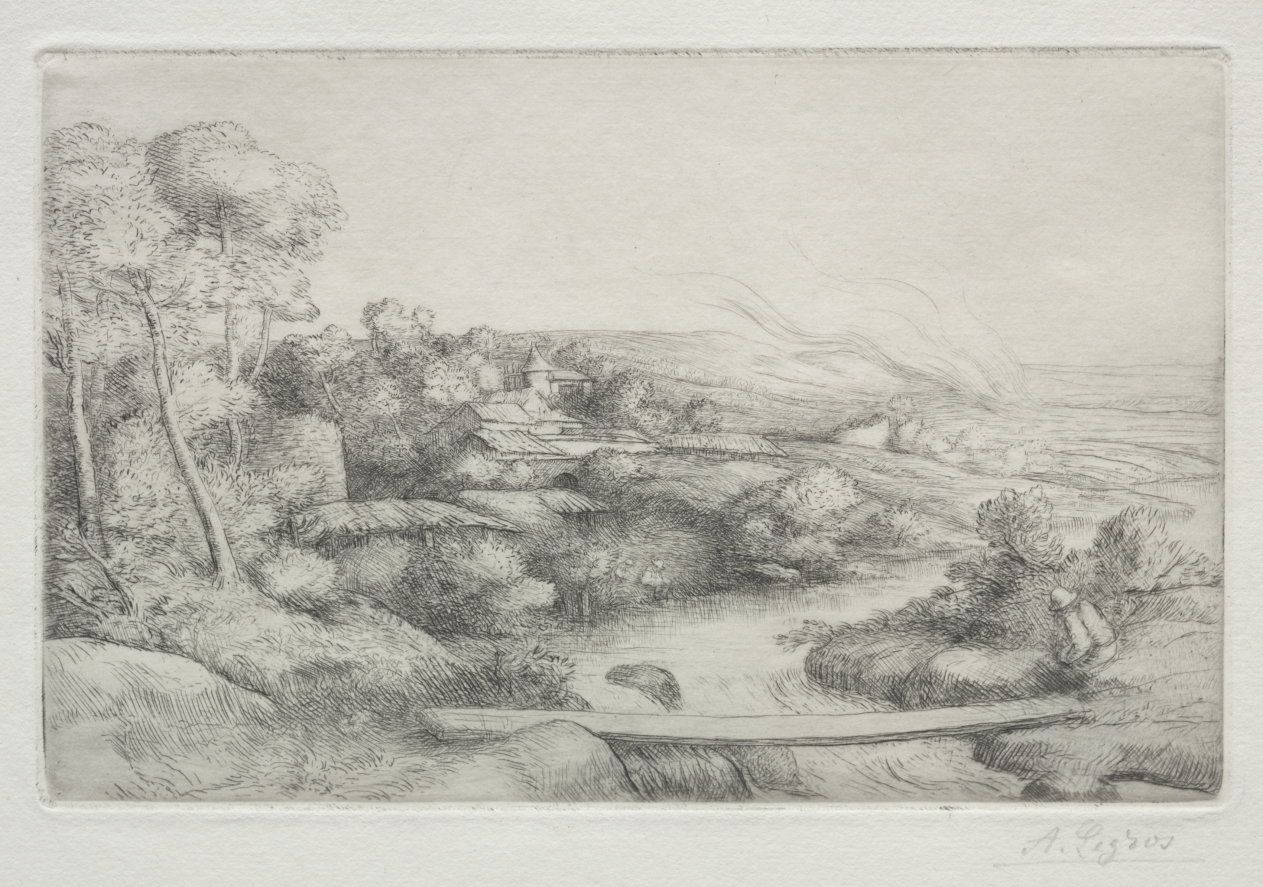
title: The Footbridge (La Passerelle)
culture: France, 19th-20th century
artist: Alphonse Legros (French, 1837–1911)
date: c. 1857–1911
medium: etching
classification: Print